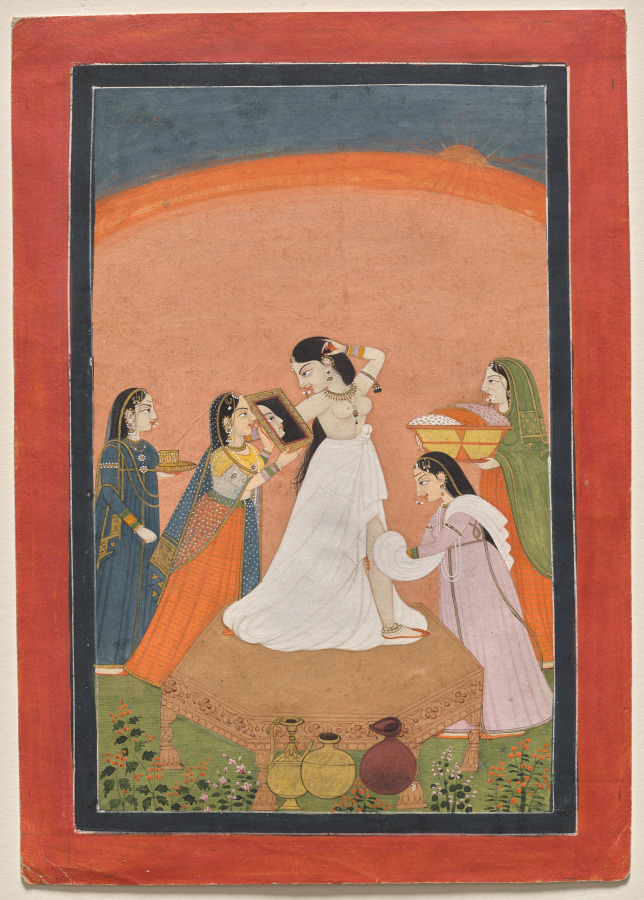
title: The Morning Toilette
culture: Northern India, Pahari kingdoms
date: 1810–25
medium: gum tempera and gold on paper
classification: Painting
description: A lady, dressed in white below the waist, admires herself in a mirror held by a handmaiden. Three other ladies attend to her toilette. She stands on a large wooden stool and raises her elbow high to adjust her earrings, providing the beholder with a glimpse of her round breasts. Ewers and water pots can be seen in the foreground.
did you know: The costume of the handmaiden holding the mirror is inspired by older Chamba paintings.